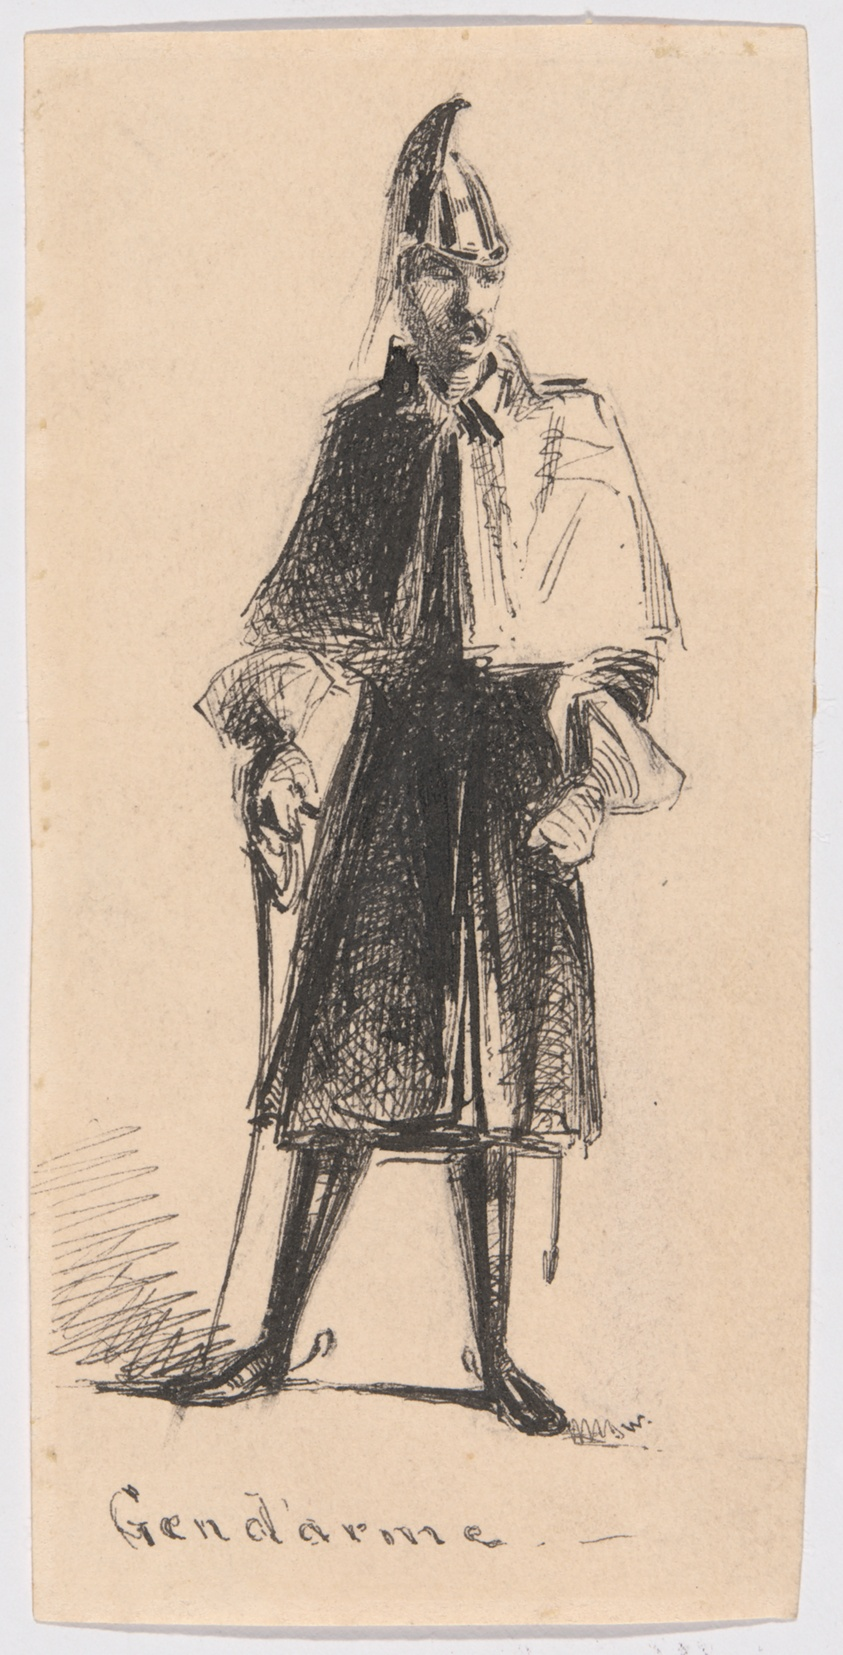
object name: Drawing and Watercolor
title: Gendarme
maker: James McNeill Whistler (American, 1834-1903)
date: 1854/55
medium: Pen and black ink over graphite on cream wove paper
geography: United States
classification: pen and ink drawings; drawings (visual works); prints and drawing; paper